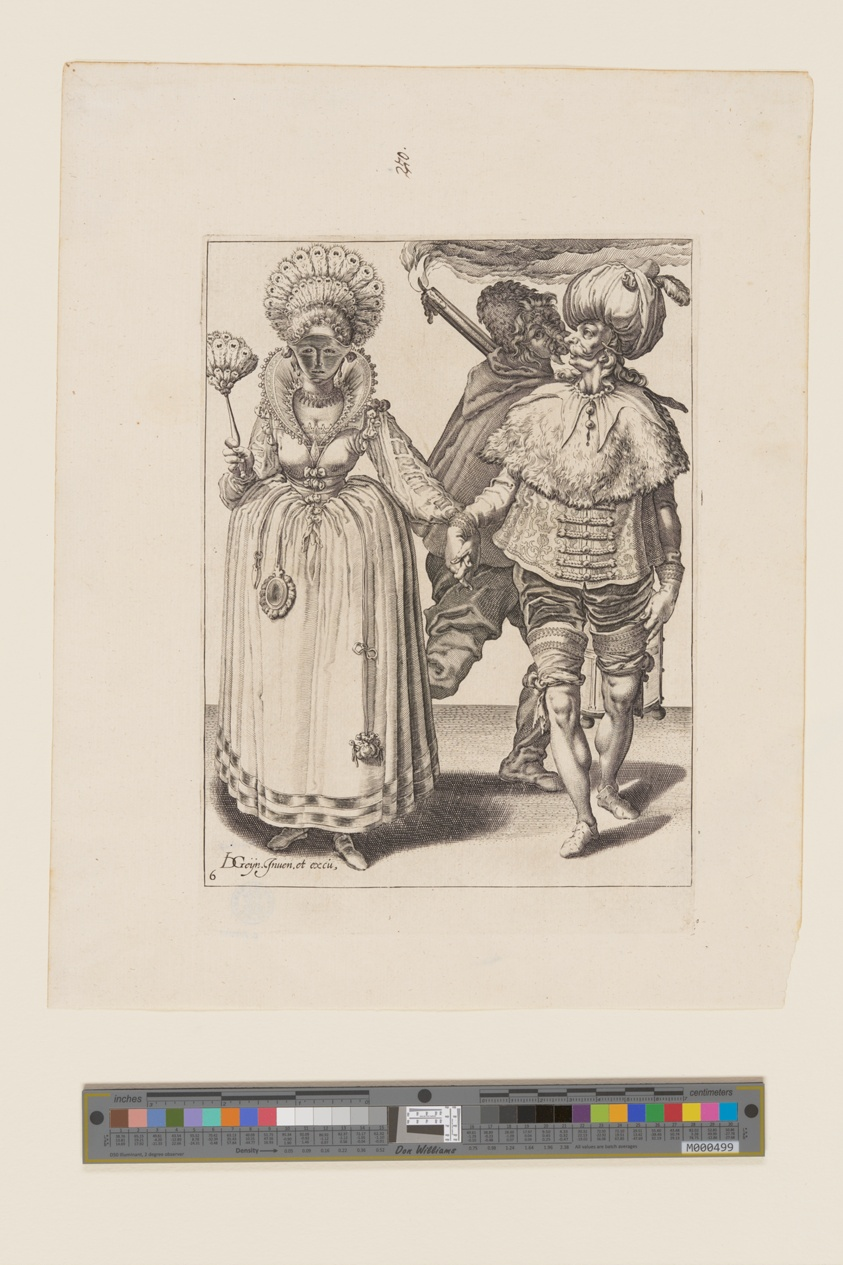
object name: Print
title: Man with a Turban Leading a Woman who is Wearing Peacock Feathers, behind them a Torchbearer, from The Masquerades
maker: Jacques de Gheyn II; Dutch, 1565–1629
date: 1595-96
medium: Engraving on ivory laid paper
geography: Netherlands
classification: engraving; paper; print; prints and drawing